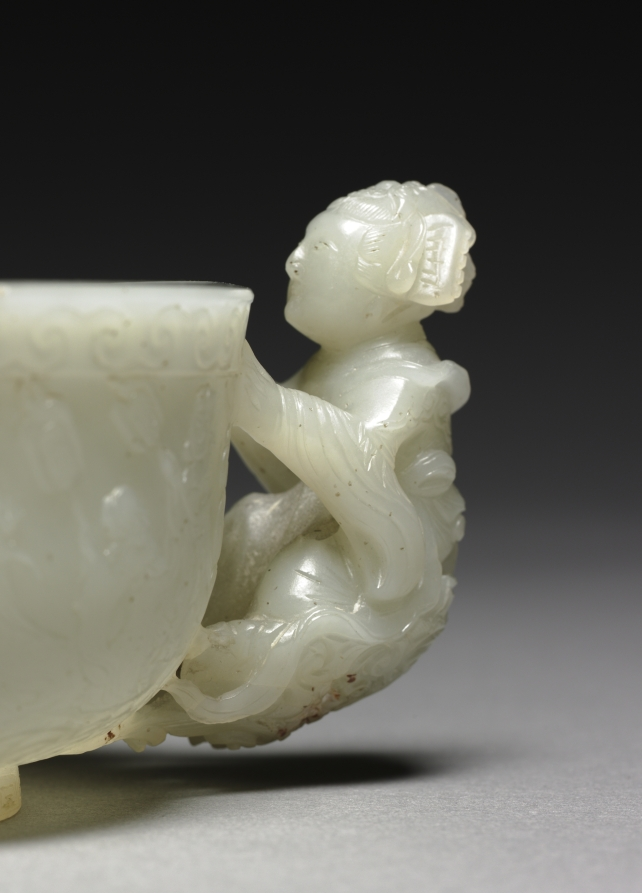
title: Cup with Daoist Figures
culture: China, Qing dynasty (1644–1911), Qianlong period (1736–95)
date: 1736–95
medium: Pale greenish-white jade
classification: Jade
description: During the Qing dynasty, Suzhou’s best products were sent north to the capital. Those that met imperial approval were sometimes graced with Qianlong’s mark, added by calligraphers and jade workers at court. The lack of a Qianlong mark on the Cleveland cup suggests that it might not have reached the court. Previously dated to the Yuan dynasty (1271–1368), new scholarship dates this cup to the Qing period.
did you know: Two female immortals serve as handles, while a Daoist procession with immortals, musicians, and attendants winds around the body of the cup.